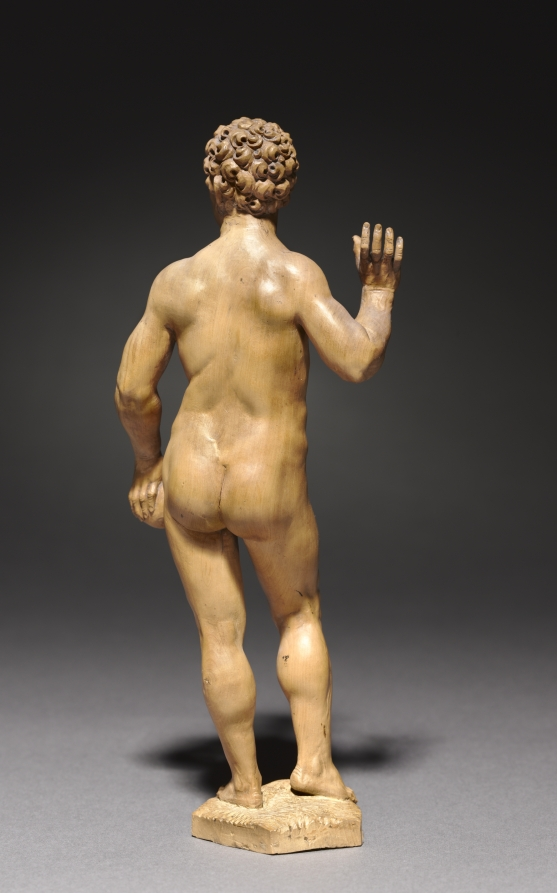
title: Adam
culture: Germany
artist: Daniel Mauch (German, 1477–1540)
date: c. 1535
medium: boxwood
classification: Sculpture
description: Mauch straddled the late medieval and Renaissance traditions in his career. These small-scale statuettes, however, each made from a single piece of boxwood, stem from the most progressive strands of Renaissance art in southern Germany, closely connected to developments in both Italian and German bronze sculpture. The bodies reveal Mauch's careful study of human anatomy as well as a rapport with Albrecht Dürer's well-known print of the same subject.